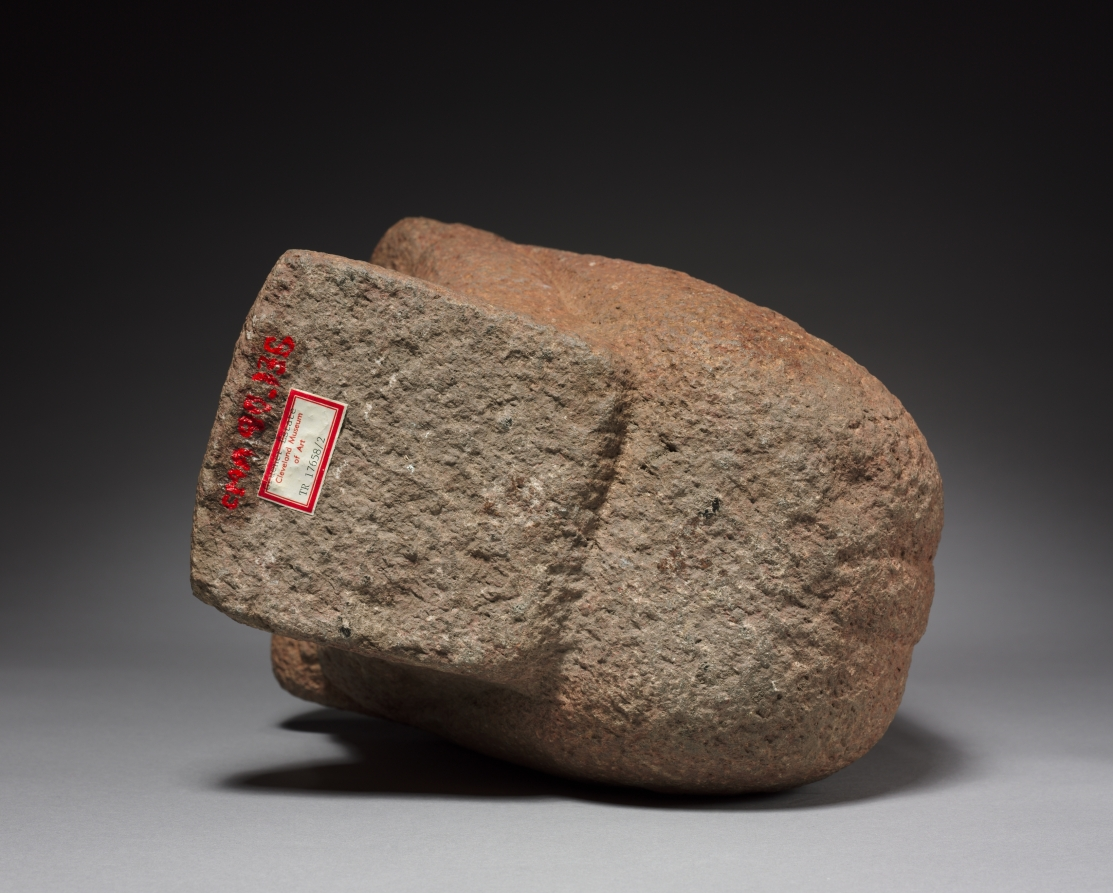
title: Seated Deity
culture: Mexico, Aztec, Valley of Mexico near Teotihuacan, Macuilxochitl (?), 14th-16th century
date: 1350–1519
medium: gray volcanic stone with red pigment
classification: Sculpture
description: The crested headdress with tassels suggests that this youthful, seated male is Macuilxochitl (Five Flower), an Aztec supernatural patron of many forms of pleasure, among them music, dance, feasting, games, and sex. His cult was popular among common people, and this effigy probably was created for use in a small neighborhood temple. The stone surface could have been plastered and then brightly painted.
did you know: The Aztecs associated the number 5 with excess: there were five gods of pleasure, one named “Five Flower.”